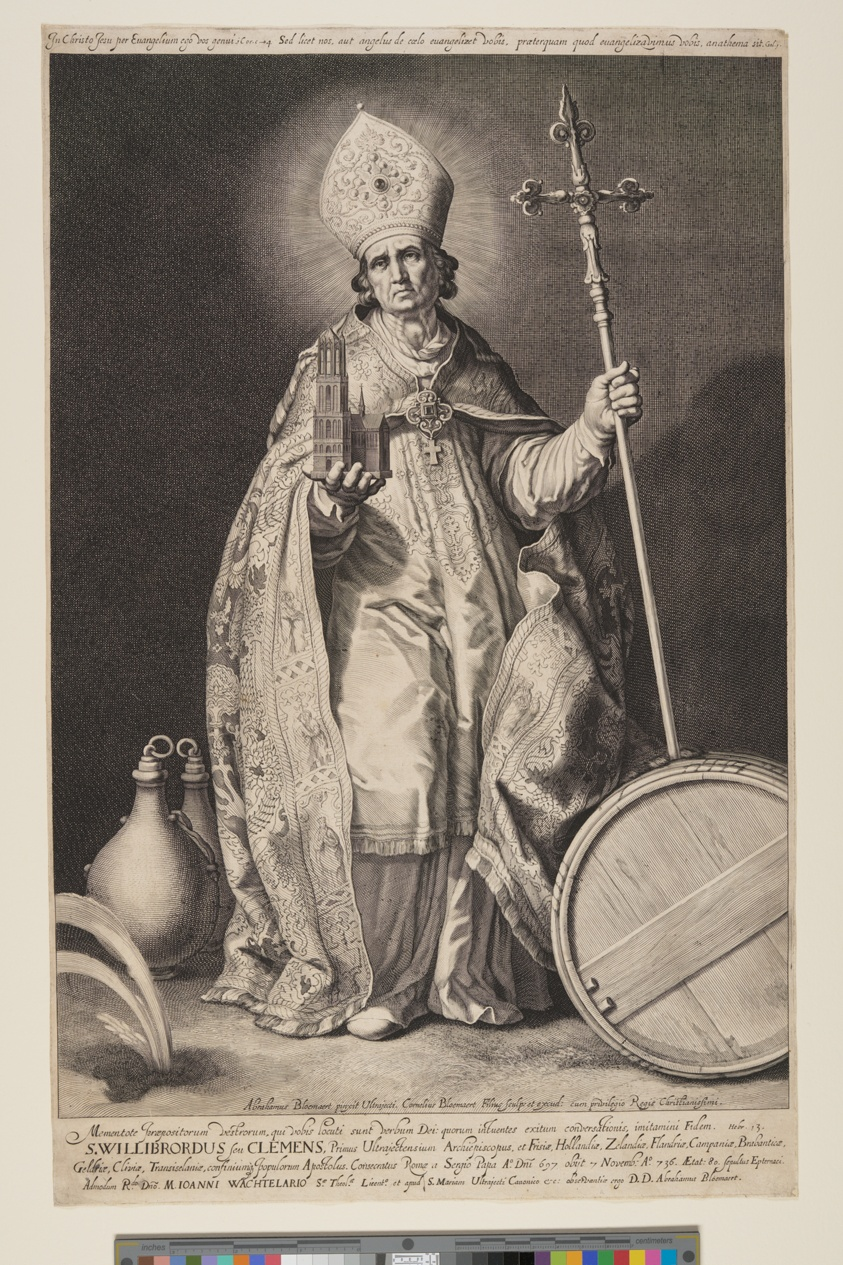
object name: Print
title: St Willibrord, plate 2, from The Bishops of Utrecht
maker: Cornelis Bloemaert (Dutch, c. 1603–1692); after Abraham Bloemaert (Dutch, 1566–1651)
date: c. 1626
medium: Engraving on ivory laid paper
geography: Netherlands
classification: engraving; paper; print; prints and drawing